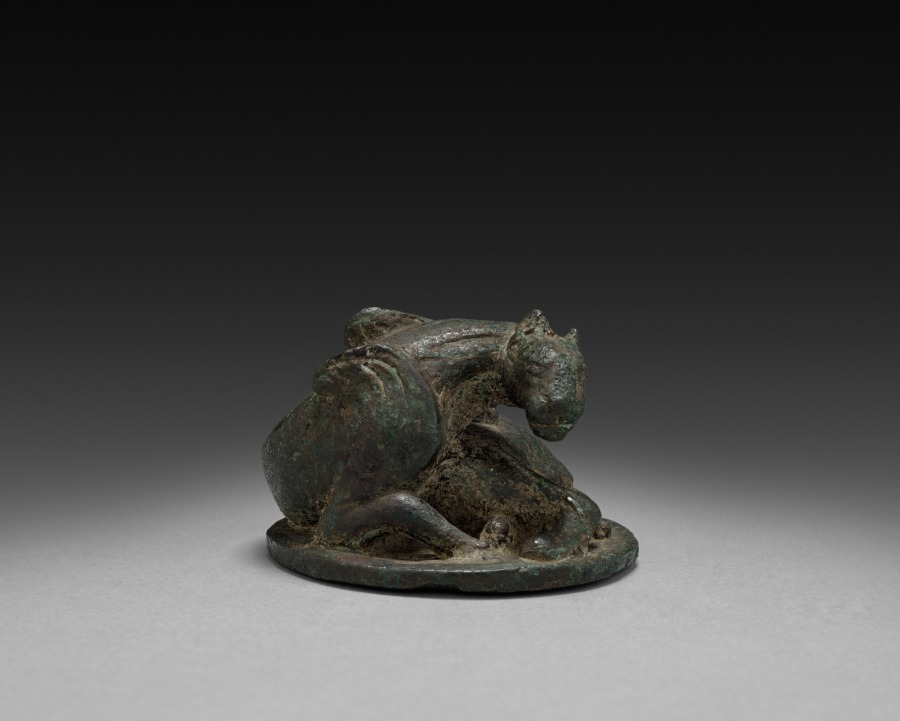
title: Weight in the Form of a Coiled Animal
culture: China, Eastern Han dynasty (25–220 CE)–Six Dynasties (317–581)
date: c. 200s CE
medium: bronze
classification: Sculpture